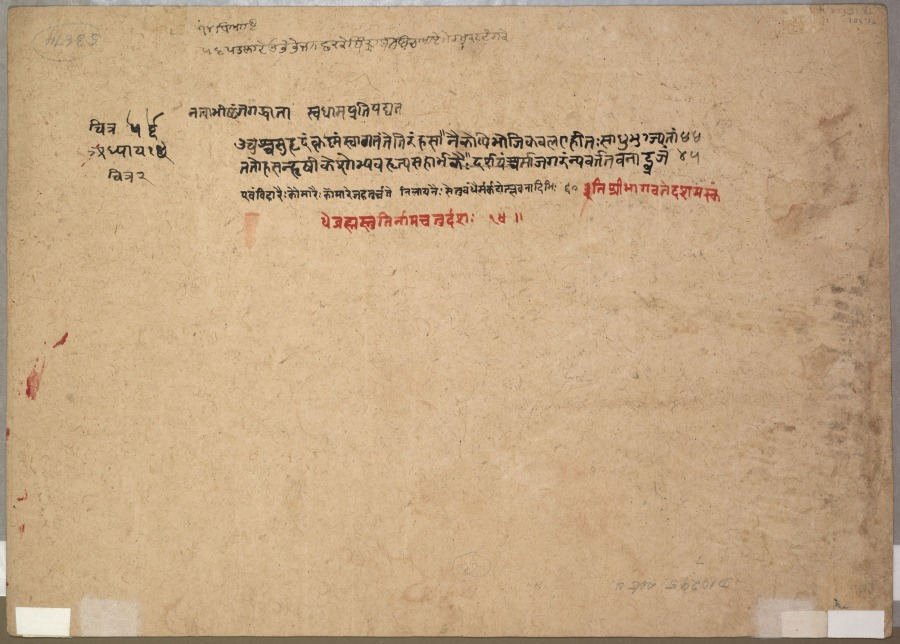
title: Krishna returns with the cowherds to Braj, from a Bhagavata Purana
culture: Northern India, Pahari kingdoms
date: c. 1830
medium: Gum tempera and ink on paper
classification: Painting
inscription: On the back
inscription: 14 dhiai, 56 pehla deobhe bhojan chhak ke brindaban bich aaye mor mukut tang ke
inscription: chitra 56 adhyah 10 chitra 2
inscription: Natvabhishtam Jagddhata Svadhama Pratyapadyat [indented]: Ucushca Srihayadah Krishnam Svagatam Tehtiramhasa Nekopyabhoji Kavala Ehiya Sadhu Bhujyatam. 44 Tato Hasan Hashikeshobhyavahritya Saharbhake Darshayam Shracharmajagaram Nyavartat Vanad Vrajam.45 Evam Vihare Komare Komaram Jahaturvraje. Nilayane Setubandhermarkatotplavanadibhi. 60 [in red]: Iti Srimadbhagvate Dashamaskande Purvardhe Brahamstutirnam Chaturdashodhyay. 14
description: The painting is based on Chapter 14 of Book 10 of the Bhagavata Purana in which the god Brahma hides the cowherds and calves of Krishna. After realizing his mistake and witnessing the divine prowess of Krishna, Brahma extols Krishna and returns to his abode while Krishna and his fellow cowherds enjoy a hearty meal and then return to Braj.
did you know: On the left the scene of the picnicking herd boys shows them eating rice on banana leaves, while on the right they drive the cows home.